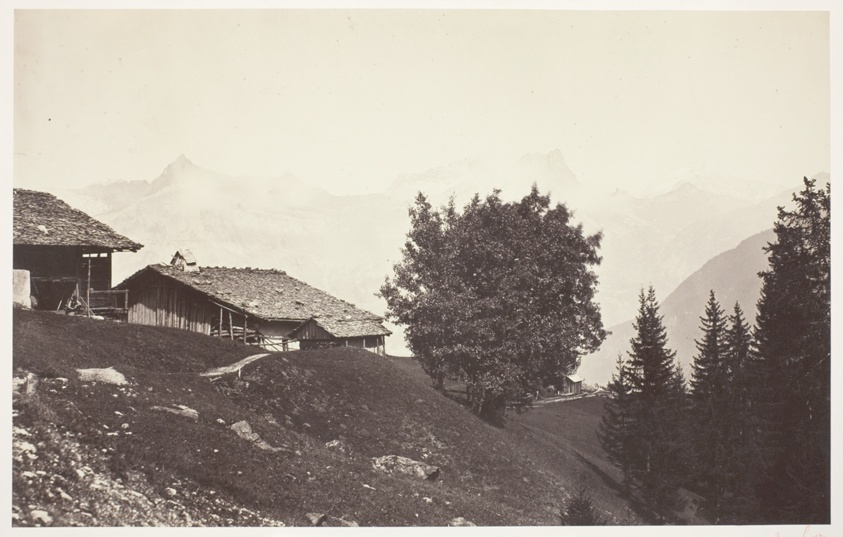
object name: Photograph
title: Savoie 47, Le Buet et les Rochers de Fis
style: 19th century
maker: Auguste-Rosalie Bisson (French, 1826–1900)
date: 1856/63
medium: Albumen print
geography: France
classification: albumen silver print; photographic process; photography; photograph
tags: Collected by Hugh Edwards